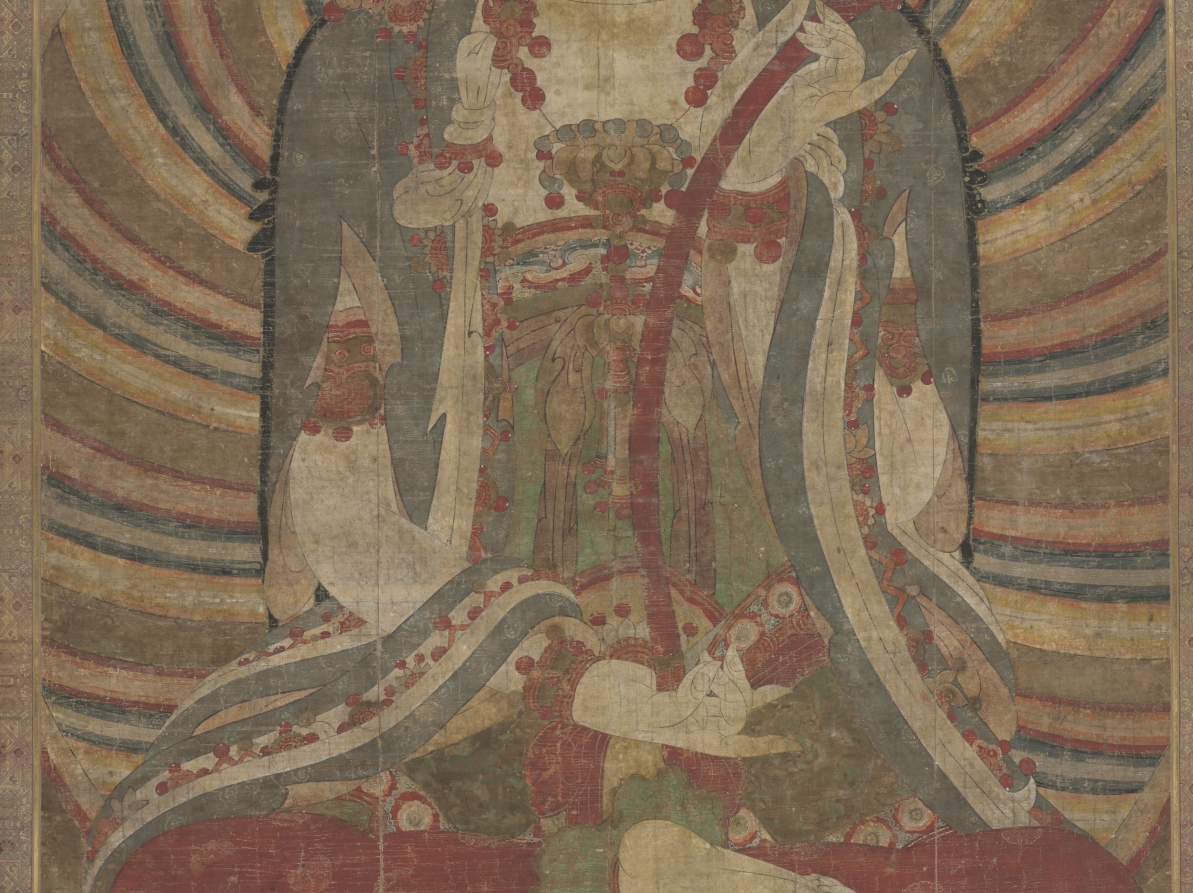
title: Seated Manjusri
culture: Korea, Joseon dynasty (1392–1910)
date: 1700s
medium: hanging scroll; ink and color on silk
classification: Painting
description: Large-size Buddhist paintings dated to the Joseon period (1392–1910) were once hung behind Buddhist statues, attached to the wall. In the Buddhist pantheon of the Joseon period, Bodhisattva Manjusri appears as a deity attendant to Vairocana Buddha.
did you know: Bodhisattva Manjusri is holding a ruyi scepter to represent ultimate wisdom.